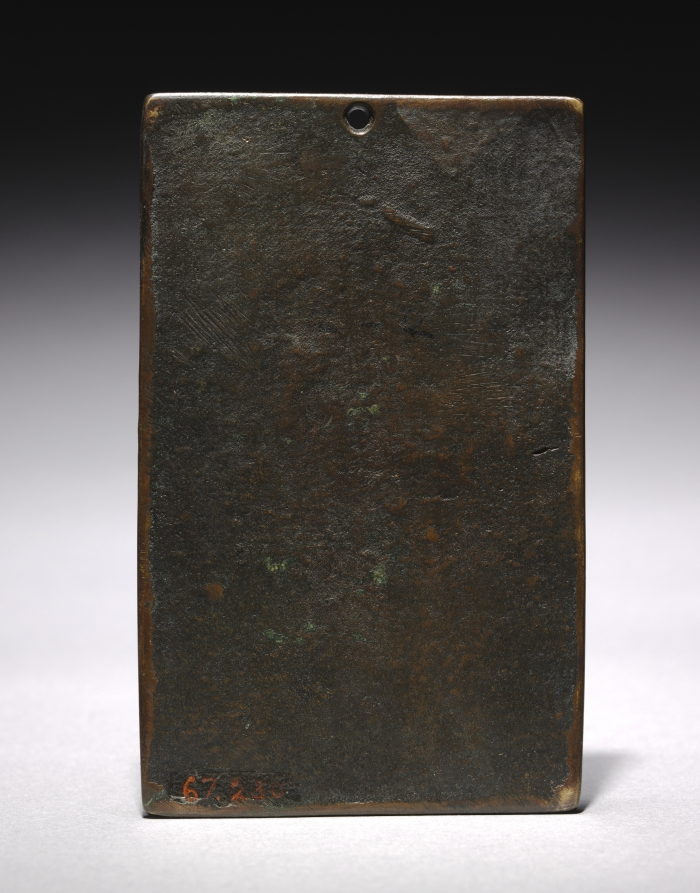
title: Allegory of Music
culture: Northern Italy, 16th century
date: c. 1500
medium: bronze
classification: Sculpture